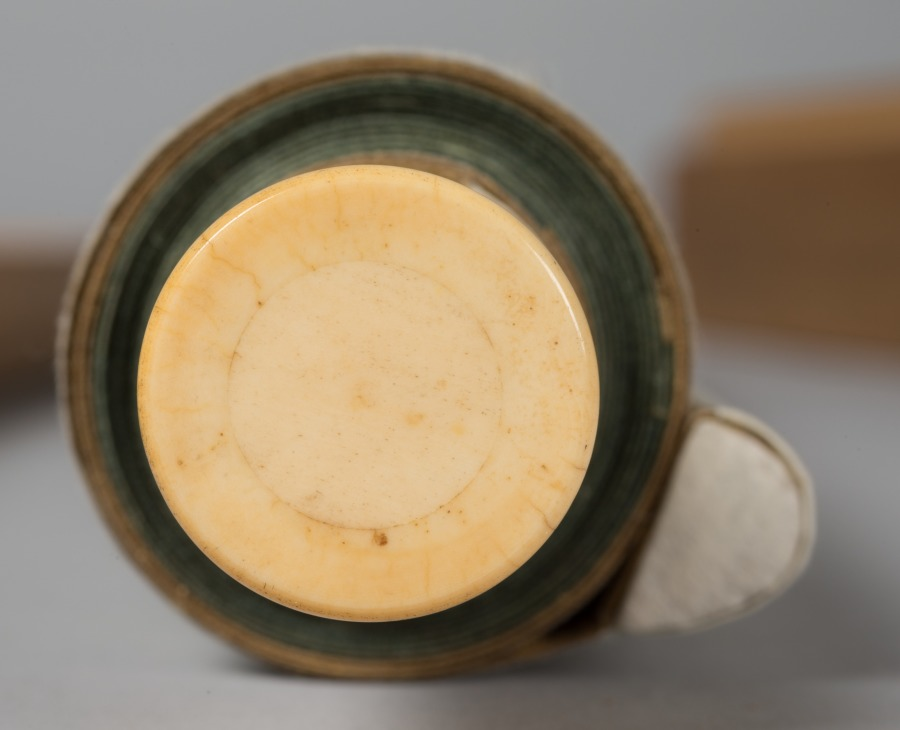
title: Goose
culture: Japan, Edo period (1615–1868)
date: c. 1615–99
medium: hanging scroll; ink on paper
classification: Painting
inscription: spurious seal of Sesshu, lower right.